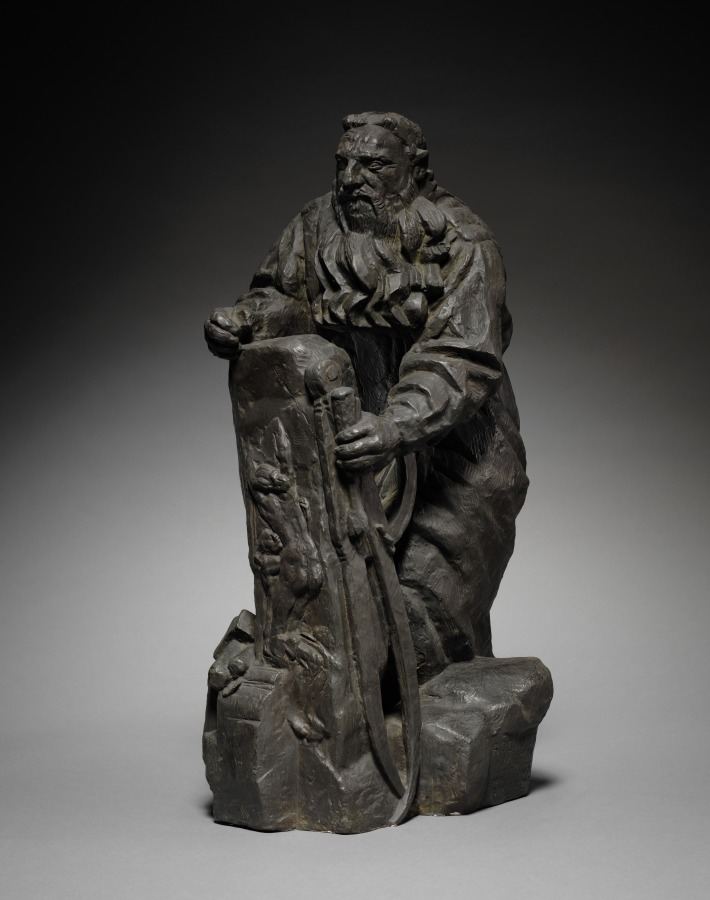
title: Rodin Working on "The Gates of Hell"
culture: France, 20th century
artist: Emile Antoine Bourdelle (French, 1861–1929)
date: 1910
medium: bronze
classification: Sculpture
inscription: Inscribed on side: "Rodin travaillant a la porte de l'enfer"; "Emile-Antoine Bourdelle, 1910"